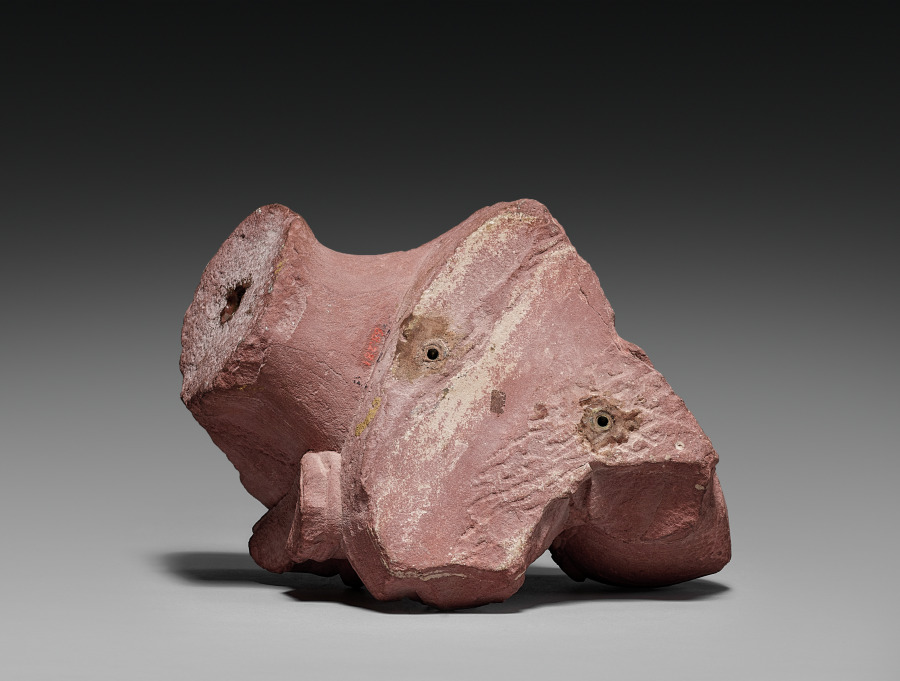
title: Attendant of Surya, the Sun God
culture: India, Mathura, Gupta Period (320-647)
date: 320–650 CE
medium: sandstone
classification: Sculpture